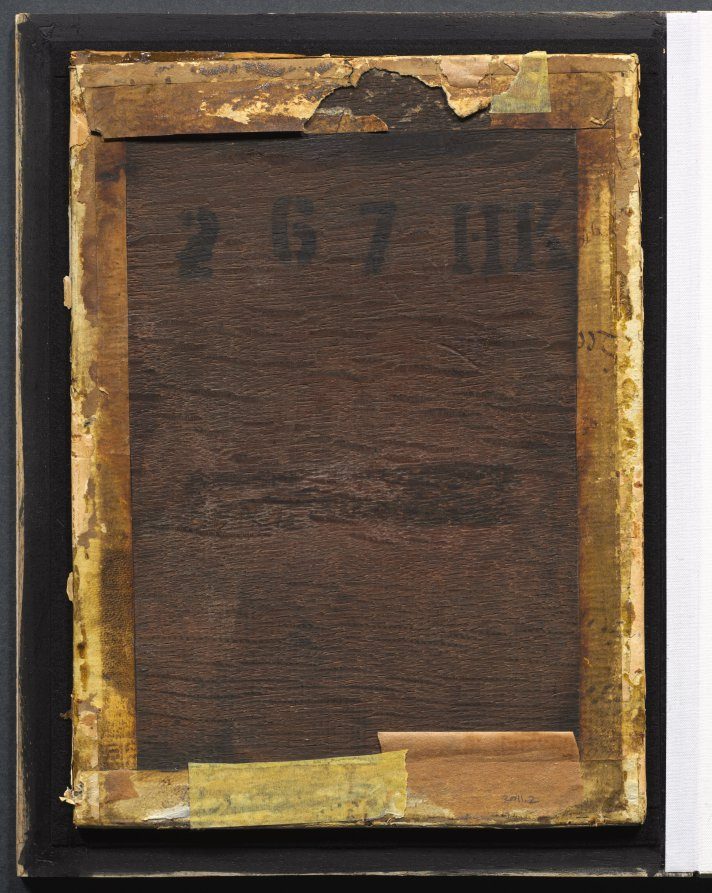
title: Madonna and Child in Glory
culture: England, 17th century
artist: Isaac Oliver (French, c. 1565–1617)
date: c. 1605–1617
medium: gouache and watercolor, heightened with gum arabic, with shell gold framing lines, on vellum, mounted on paper, vellum, and wood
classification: Portrait Miniature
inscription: signed with monogram in gold, lower right: "IO"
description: It is difficult to overstate the singularity of this work in 17th-century England. While the image has visual sources in works by Rubens and Federico Barocci, surely known to the cosmopolitan artist (who travelled to Italy, unusually for English artists at this moment), the object is iconographically unique. Oliver places a tender Virgin and Child (itself more closely linked to Catholic instead of Protestant imagery), in a heavenly, visionary setting, and incorporates the medieval iconography of the lactating Virgin with the Salvator Mundi, early Netherlandish in origin, but more commonly an Italian typology by the early seventeenth century.